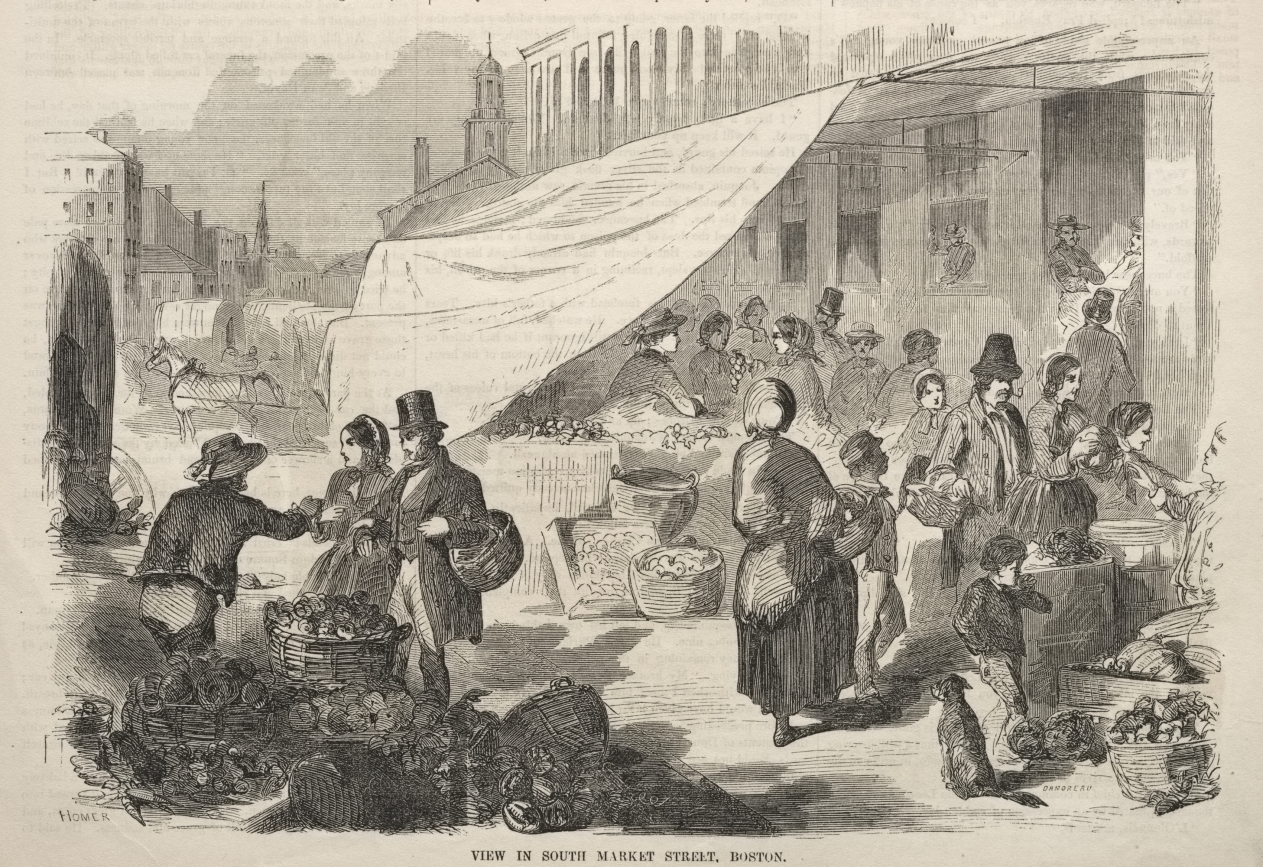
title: View in South Market Street, Boston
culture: America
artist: Winslow Homer (American, 1836–1910)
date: 1857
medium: wood engraving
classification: Print